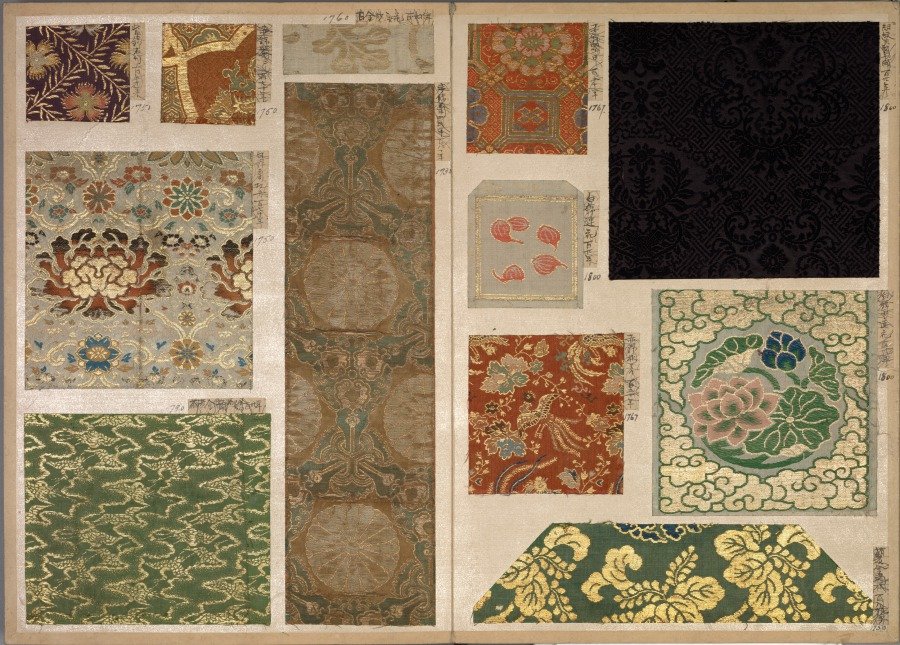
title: Album of Textile Samples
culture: Japan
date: 1790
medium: silk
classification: Textile